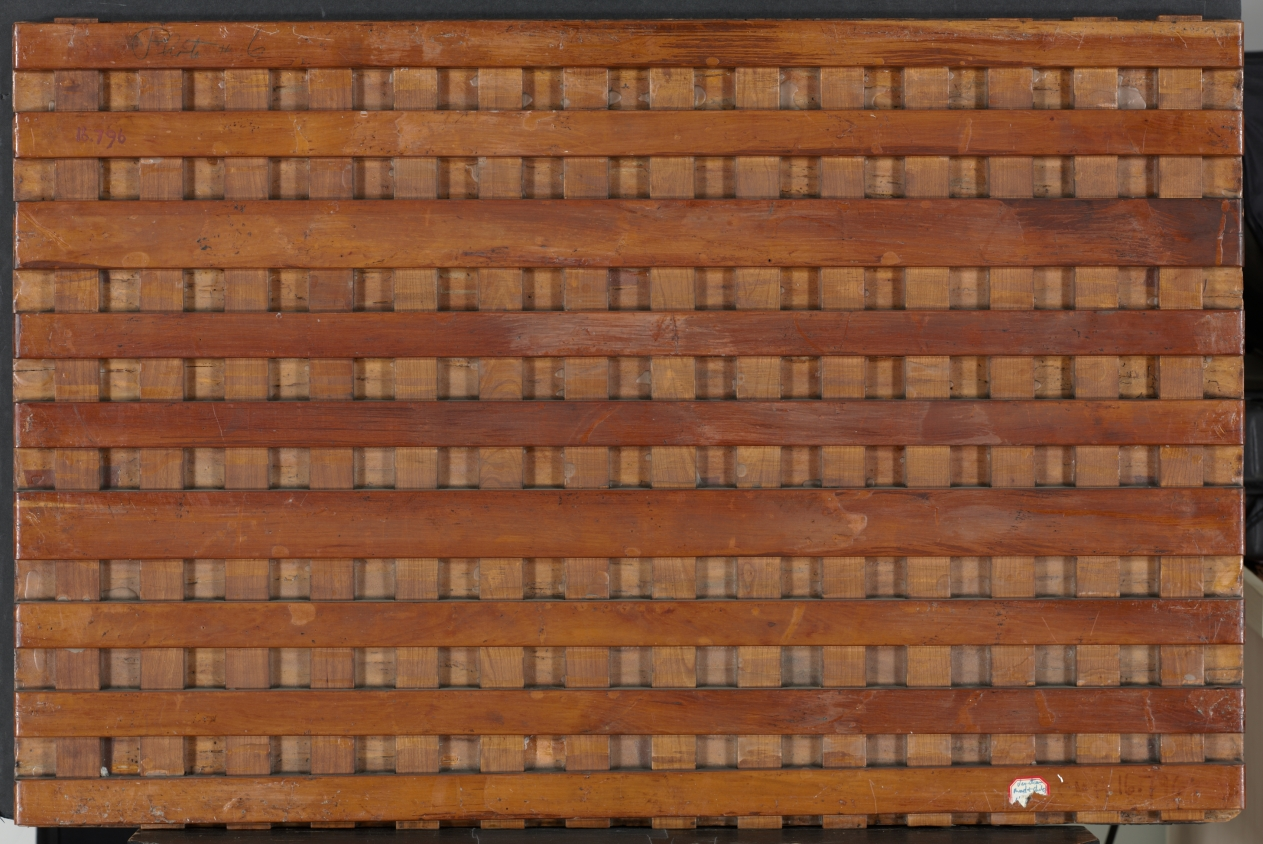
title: Virgin and Child with Saints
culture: Italy, Venice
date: c. 1510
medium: oil on wood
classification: Painting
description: What are some of the key steps in conserving this picture? While it may seem disturbing, the condition of this work is not unusual for a 16th-century panel painting. Treatment was abandoned decades ago when the conservator who was cleaning the work left the museum. Brilliant colors and beautiful original passages remain, including expressive folds of red drapery and delicate flesh tones. New technical research could tell us more about how the panel was painted and subsequently treated. Identifying the artist is another key step that would help conservators reconstruct distinctive passages like hands and facial features. A painting by Francesco Bissolo in Munich (below) is closely related in subject and style and may provide some clues.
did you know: The Virgin Mary is often depicted wearing blue and red, symbolizing her purity and devotion.